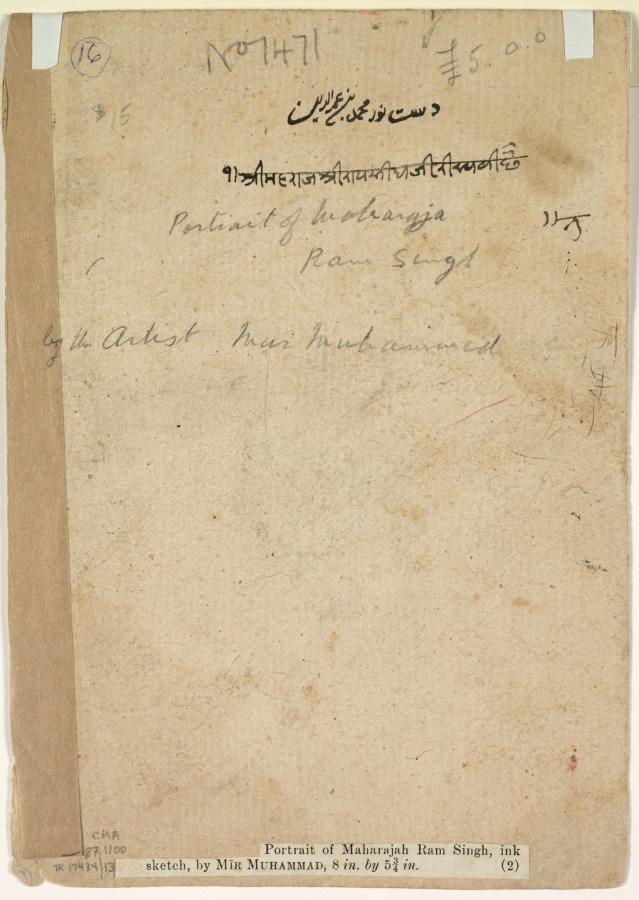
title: Portrait of Maharaja Rai Singh of Bikaner (reigned 1574-1612)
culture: Mughal India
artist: Nur Muhammad (Indian, active c. 1580–1630)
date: c. 1590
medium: Ink and gum tempera on paper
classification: Painting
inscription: Devanagari inscription on the verso reads ‘sri maharaja sri rai singh ji ri sabi chhe’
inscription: Nastaliq inscription on the verso reads ‘dast-i-nur mohammad-bin umar-ud-din’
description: Drawings such as this served as models for formal painted portraits of Mughal and Rajput royalty in court workshops. The confident contour lines, delicate shading, and subtle facial expression are the work of the master artist Nur Muhammad (active 1570s–1630s), identified in a Persian inscription on the back. He came from a distinguished family of artists who settled in Bikaner by the mid-1500s. Nur Muhammad also worked at the Mughal court, notably for the mother of Emperor Akbar (reigned 1565–1605). His descendants continue to be recognized as the master artists of Bikaner up to the present day.